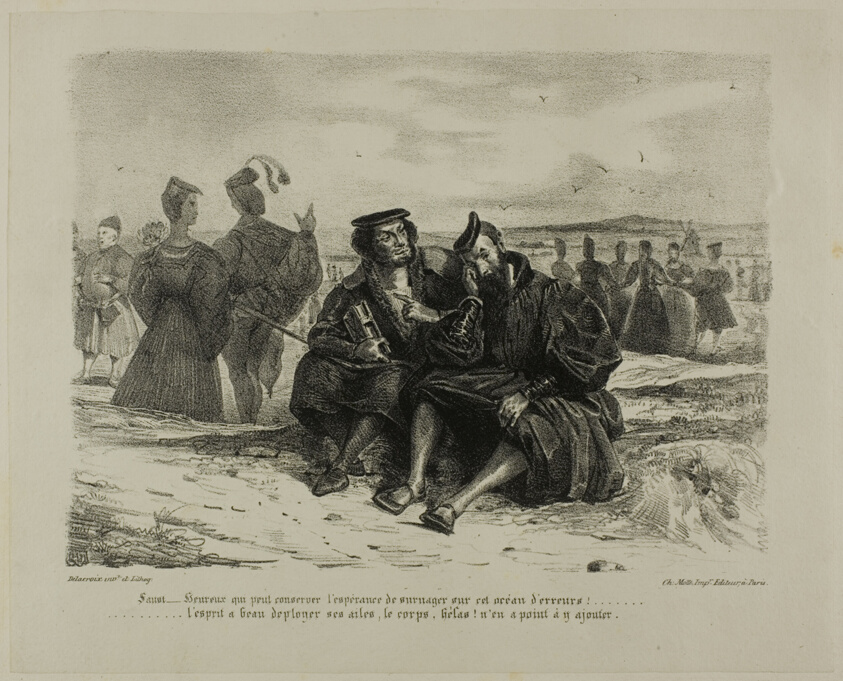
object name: Print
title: Faust and Wagner, from Faust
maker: Eugène Delacroix (French, 1798-1863)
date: 1828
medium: Lithograph in black on white wove paper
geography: France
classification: lithograph; print; prints and drawing